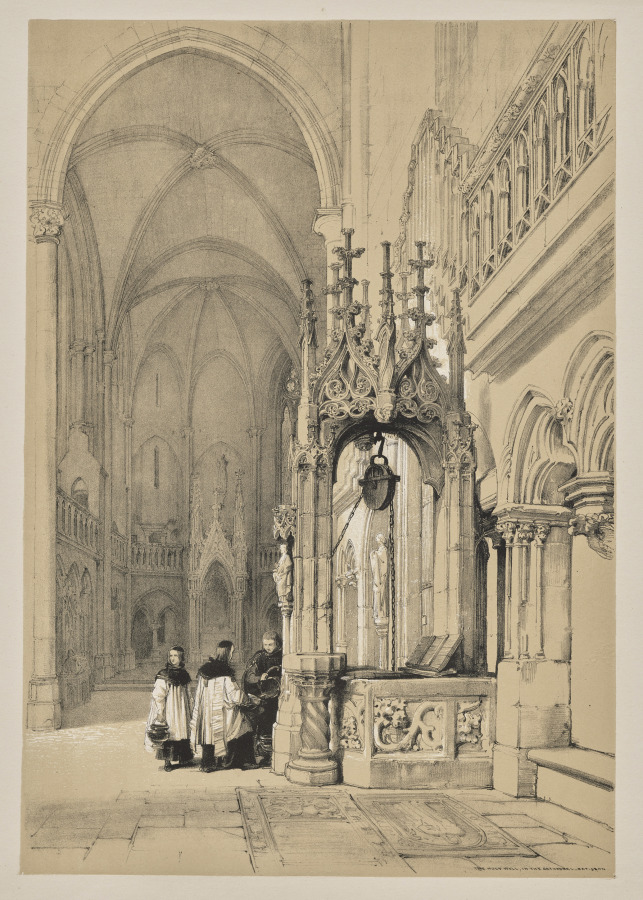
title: Sketches in Belgium and Germany, First Series, The Holy Well in the Cathedral of Ratisbon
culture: England, 19th century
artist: Louis Haghe (British, 1806–1885)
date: 1845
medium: lithograph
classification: Print